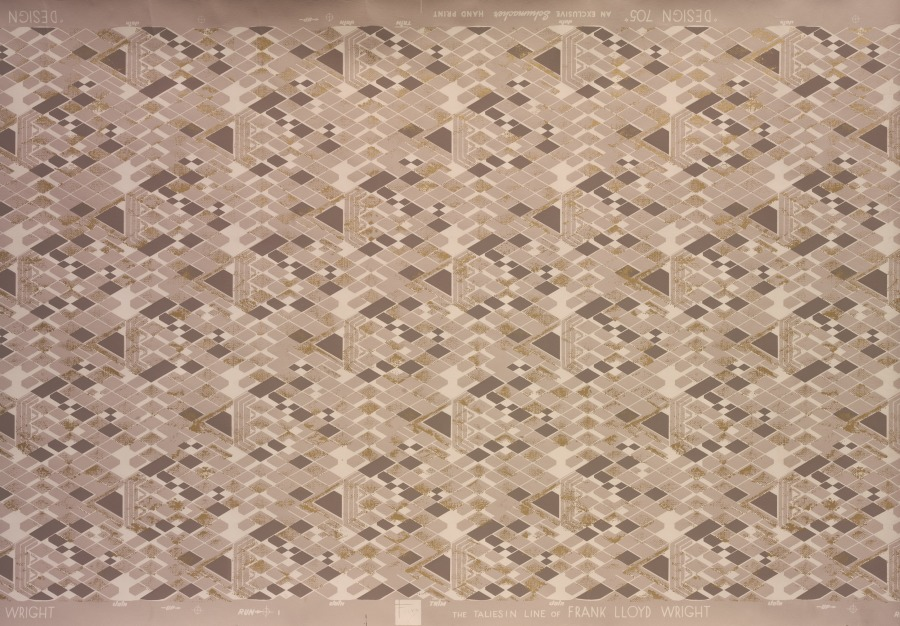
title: Design 705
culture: America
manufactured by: F. Schumacher and Co. (American)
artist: Frank Lloyd Wright (American, 1867–1959)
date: before 1959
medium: silkscreen on wallpaper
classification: Print